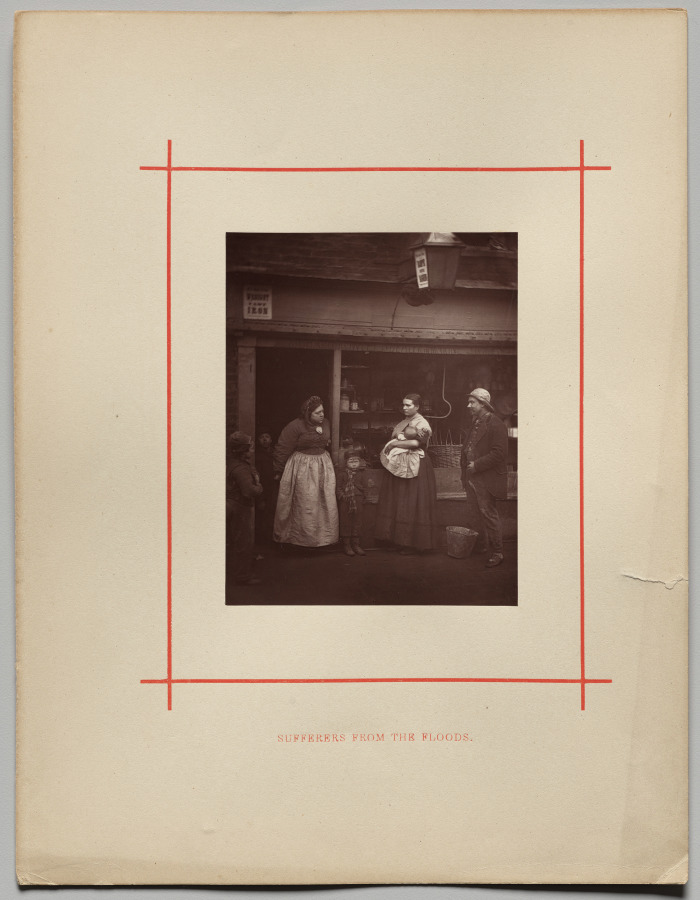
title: Sufferers from the Floods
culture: England, 19th century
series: Street Life in London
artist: John Thomson (Scottish, 1837–1921)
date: 1877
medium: woodburytype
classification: Photograph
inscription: Stamped in red ink on recto of mount: “SUFFERERS FROM THE FLOODS.”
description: Smith and Thomson decided to photograph the once-prosperous Rowletts in front of the rag shop that they owned and lived in to show that the floods caused long-term financial losses and health problems that drove even the middle class into poverty. The woman with the baby lived in the house next door; her entire family suffered constant colds and rheumatism from the persistent dampness.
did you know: Annual tidal overflow of the Thames River flooded less prosperous areas of London, leaving behind “a trail of misery . . . and a damp, noxious, fever-breeding atmosphere.”